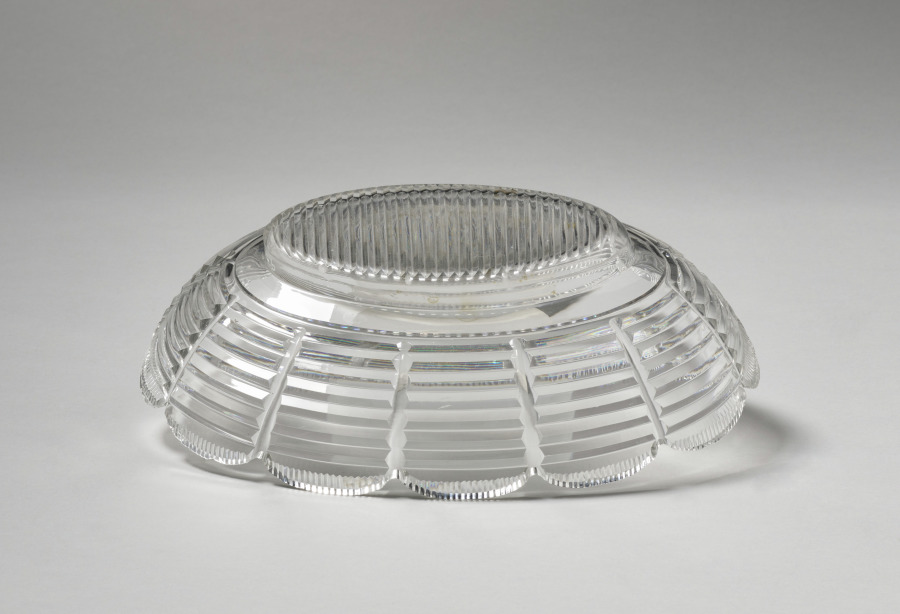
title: Centerpiece (glass bowl)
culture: England, 18th century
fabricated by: William Pitts (British)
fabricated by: Joseph Preedy (British)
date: 1792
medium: silver and glass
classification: Silver